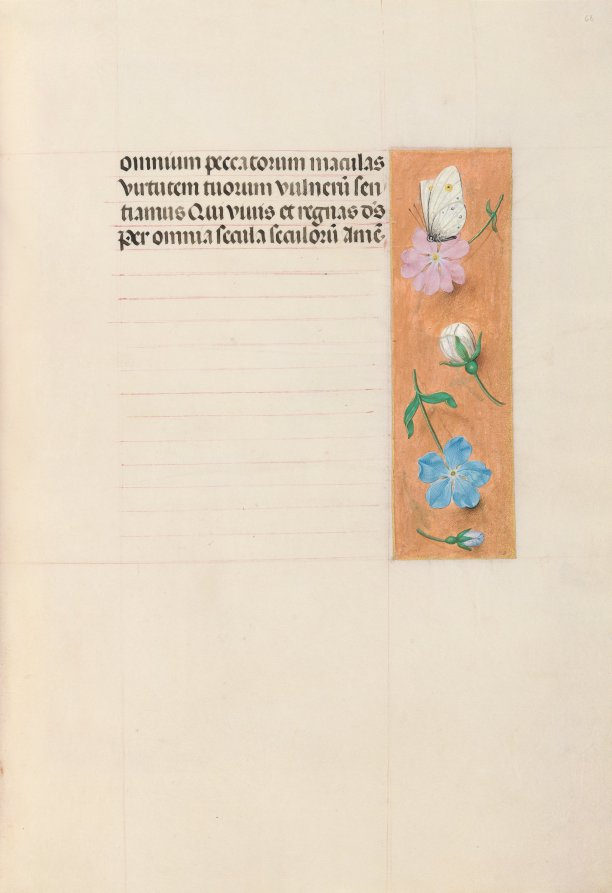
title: Hours of Queen Isabella the Catholic, Queen of Spain: Fol. 68r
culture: Flanders, Ghent and Bruges, late 15th century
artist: Master of the First Prayerbook of Maximillian (Flemish, c. 1444–1519)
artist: and Associates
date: c. 1500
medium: ink, tempera, and gold on vellum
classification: Bound Volume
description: This manuscript was illuminated by a circle of at least five highly organized manuscript painters active in the Flemish cities of Ghent and Bruges. The principal illuminator was Alexander Bening, who painted the majority of the book's miniatures. Manuscripts produced by this circle of artists are renowned for the decoration of their borders, which typically feature a rich variety of realistically-painted flowers, birds, and butterflies. This prayer book, called a book of hours, was intended not for a cleric, but for the private devotions of a lay person-in this case, Isabella the Catholic, Queen of Spain (1451-1504). Isabella's coat of arms embellishes the book's frontispiece. It is unlikely that the book was commissioned by the Queen herself; rather, she probably received it as a diplomatic gift from someone courting her patronage, perhaps Cardinal Francisco Jimenez de Cisneros. A Franciscan friar, Jimenez was dependent upon Isabella for his advancement, first to the post of Queen's confessor in 1492, and then to Archbishop of Toledo in 1495.